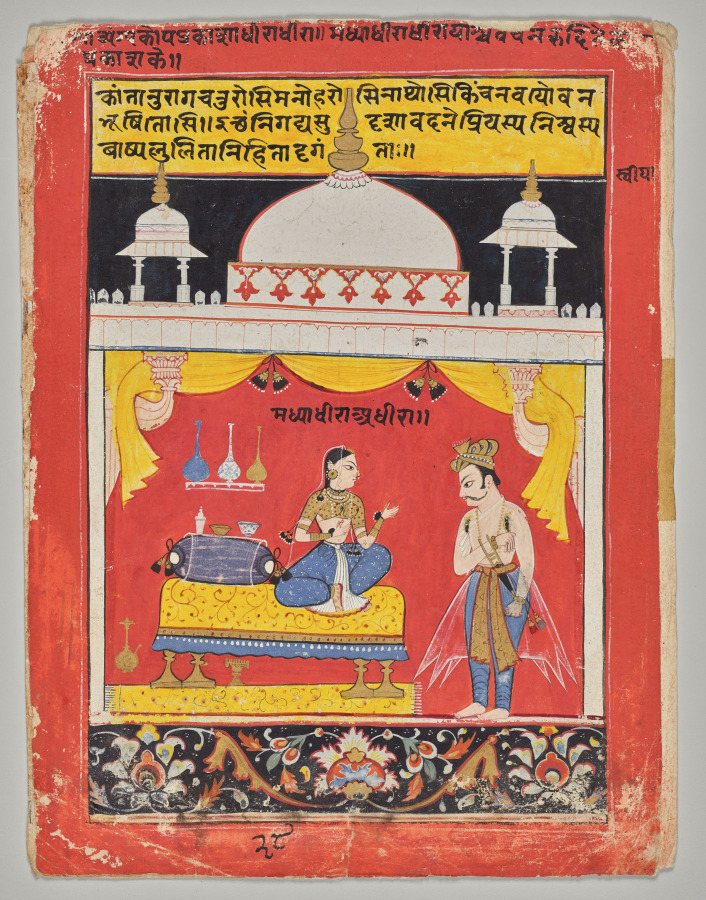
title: A Young, Angry Heroine, Folio 28 from a Rasamanjari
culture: Northwestern India, Rajasthan, Rajput Kingdom of Mewar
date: c. 1615–20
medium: Gum tempera, ink, and gold on paper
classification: Painting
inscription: Recto, upper center: You are expert in flirtation; you are charming; you are my lord and wonderful in your youthful handsomeness.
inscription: Recto, center: Madya Dhira Adhira.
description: The scene of a conversation between two lovers is set within a bedchamber, golden curtains pulled up. The heroine sits on the bed, with three long-necked wine vessels on the wall behind her. A brass ewer for washing with water is on the floor behind the bed.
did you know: Men applied fragrant black pastes to their underarms.